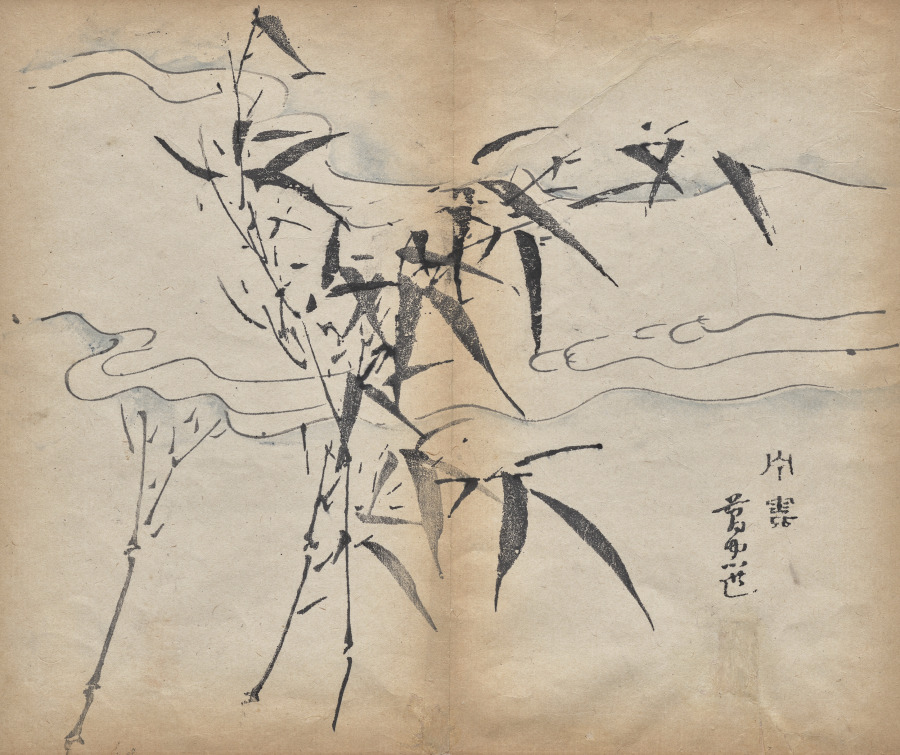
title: Bamboo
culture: China, Ming dynasty (1368–1644)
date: 1625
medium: color woodblock print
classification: Print